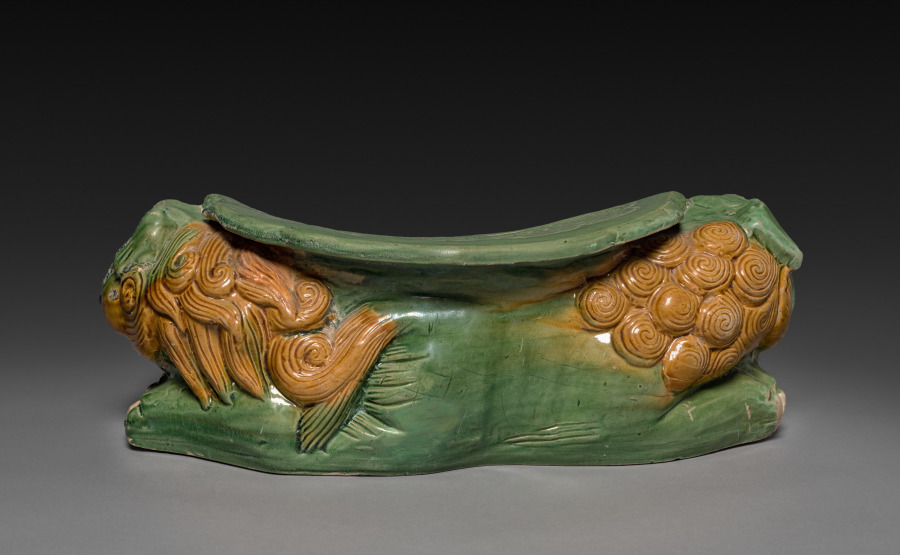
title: Headrest with Three Lions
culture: China, Liao dynasty (916-1125)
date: 916–1125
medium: Glazed earthenware, sancai (three-color ware)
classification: Ceramic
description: Three lions—two ferocious adults and one playful cub—form the base of this Chinese headrest. Often found at burial sites, headrests probably had multiple uses for their owners, but their exact origins are unknown. As ceramic pillows, headrests were cooling on hot summer nights. As decorative objects, their form and ornamentation conveyed symbolic meaning for their owners. Lions are used as decoration on headrests because of their association with protection, as fierce beasts with the strength to ward off evil spirits while one sleeps. While headrests made of hard materials may seem unusual now, their use crosses time periods and cultures.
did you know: Headrests are not just decorative—they would also be slept on as pillows.